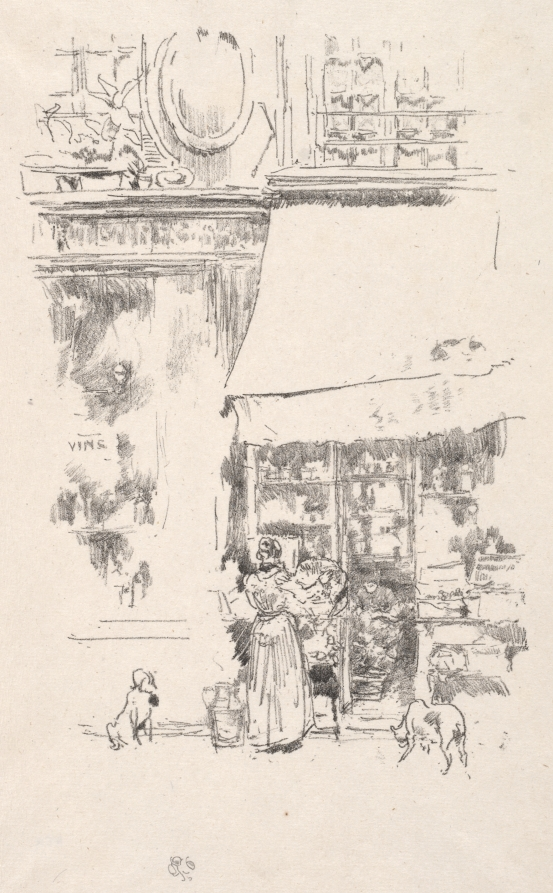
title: La fruitière de la Rue de Grenelle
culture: America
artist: James McNeill Whistler (American, 1834–1903)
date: 1874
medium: lithograph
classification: Print